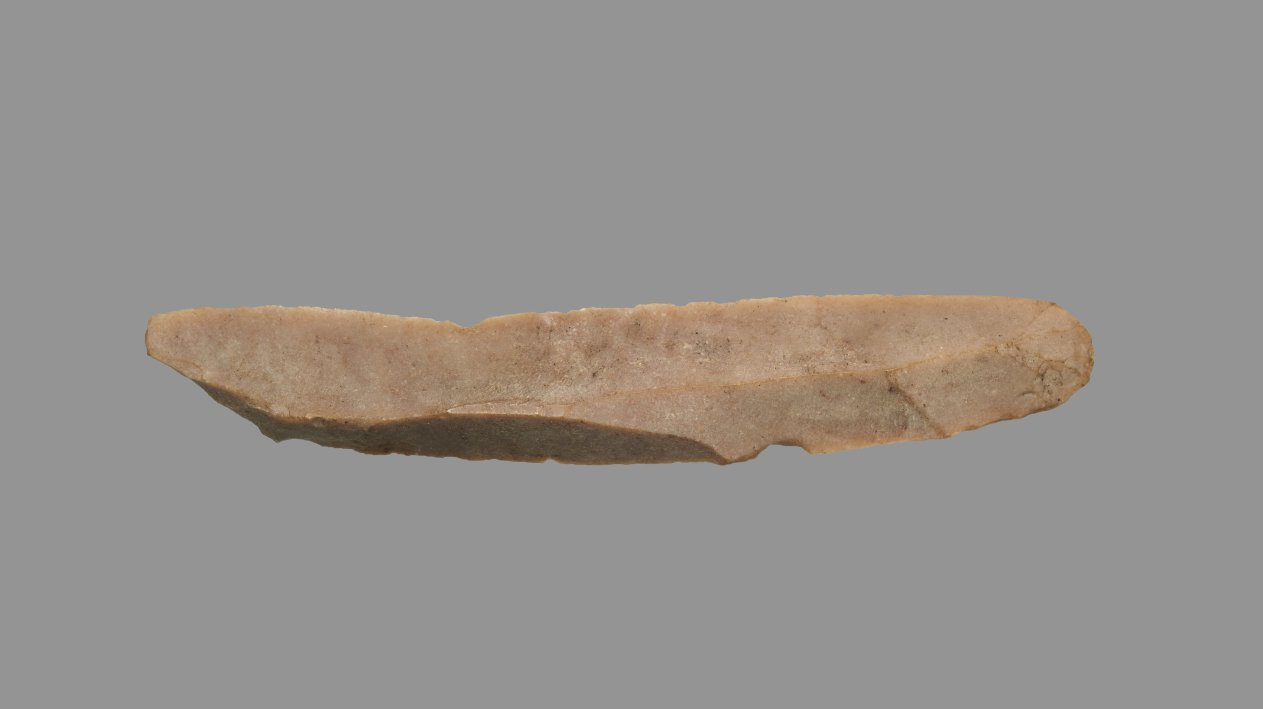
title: Sickle Blade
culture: Egypt, Middle Kingdom (2040–1648 BCE), Dynasty 12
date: 1980–1801 BCE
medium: flint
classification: Implements